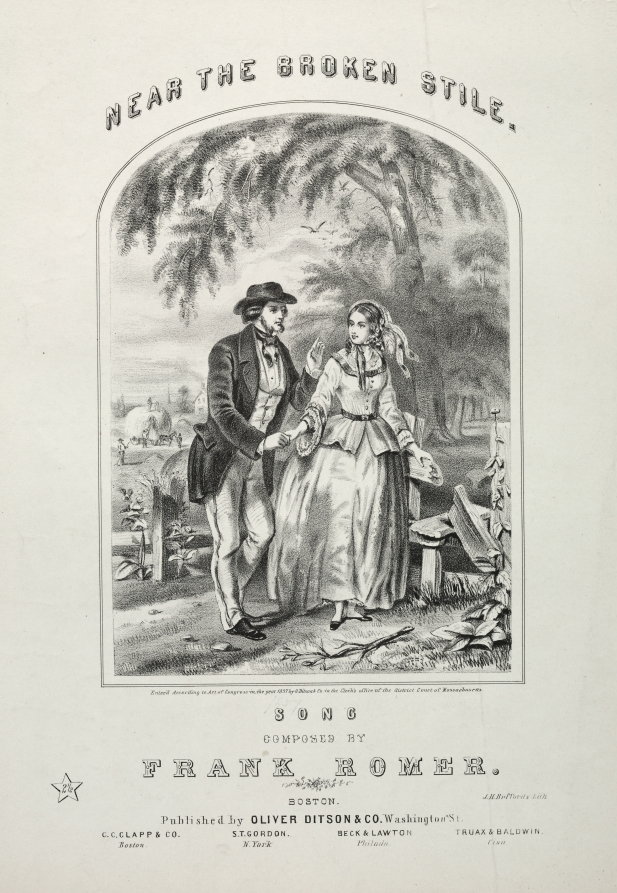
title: Near the Broken Stile - Sheet Music Cover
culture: America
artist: Winslow Homer (American, 1836–1910)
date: c. 1857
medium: lithograph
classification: Print